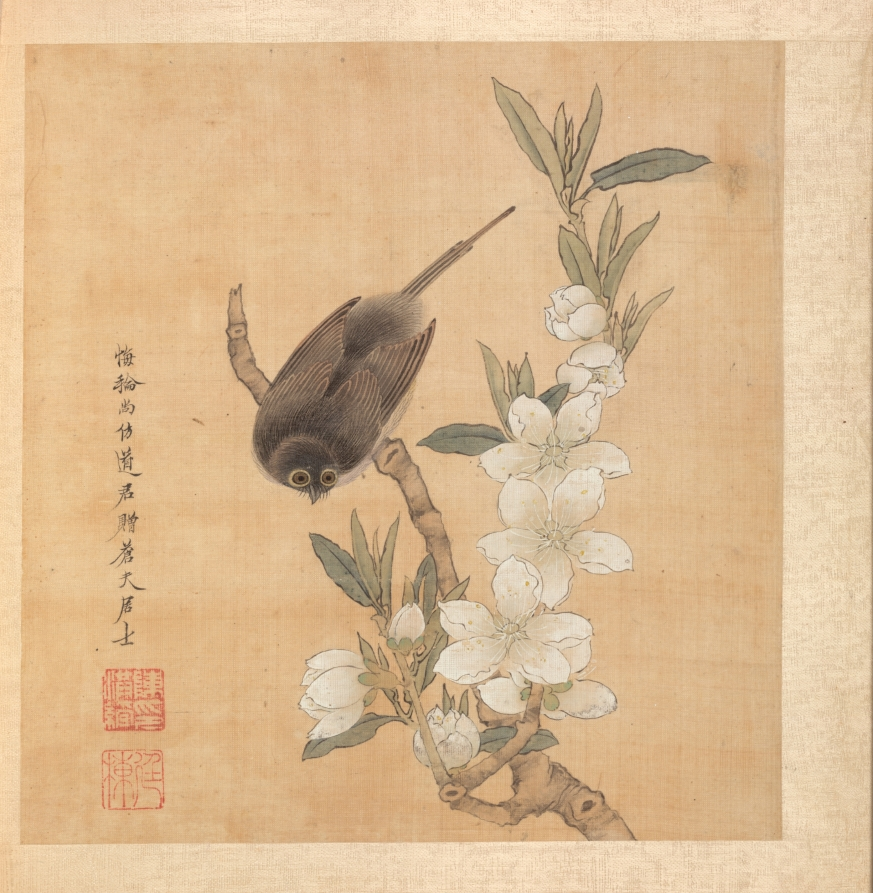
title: Paintings after Ancient Masters: A Bird and Peach-Blossom Branch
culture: China, Ming dynasty (1368–1644)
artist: Chen Hongshou (Chinese, 1598/99–1652)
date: 1598–1652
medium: album leaf, ink and color on silk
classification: Painting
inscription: Hui-lun-shang painted after Tao-chün [Emperor Hui-tsung] and presented it to Ts'ang-fu chü-chih. [Seal] Ch'en yin Hung-shou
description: The twenty paintings in this double-album by Chen Hongshou include landscapes, figures, and flowers. It also has one leaf featuring a woman, an often-used subject not found in the other albums from the latter part of his career. His late works are wonderful summations of Chen's peculiar and quirky art--archaistic, hyper-refined--but without accompanying shallowness or sentimentality. His figures and landscapes in the late albums are miniaturized, not unlike the small Chinese gardens, or the carefully selected small table rocks or old roots used for contemplation to see the world in miniature. This loss of scale is quite deliberate and reflects the psychological situation of a depressed class like the Ming loyalist officials and scholars, deprived of their integrity and honor, and forced to lead a diminished and restricted existence.